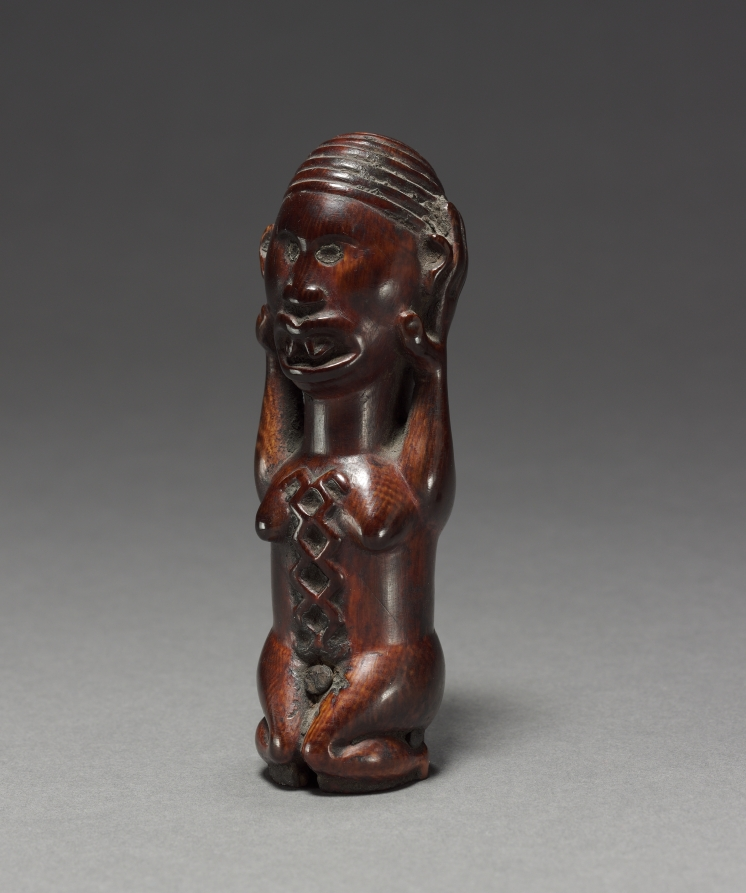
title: Female Figurine or Finial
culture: Central Africa, Democratic Republic of the Congo (most likely), Cabinda, or Republic of the Congo, Kongo people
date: late 1800s-early 1900s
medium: Ivory and iron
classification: Sculpture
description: This ivory figurine most likely served as the finial of a wooden staff or scepter, and owned and used by a high-ranking official or a ritual specialist. The combination of its features is quite unusual. The kneeling attitude is rather common and typically denotes respect. However, the position of the hands is anatomically incorrect with the thumbs toward the face. The idea of the striking hand gesture may refer to mourning.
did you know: The oversized hands with elongated fingers are positioned in an anatomically incorrect manner with the thumbs toward the face.